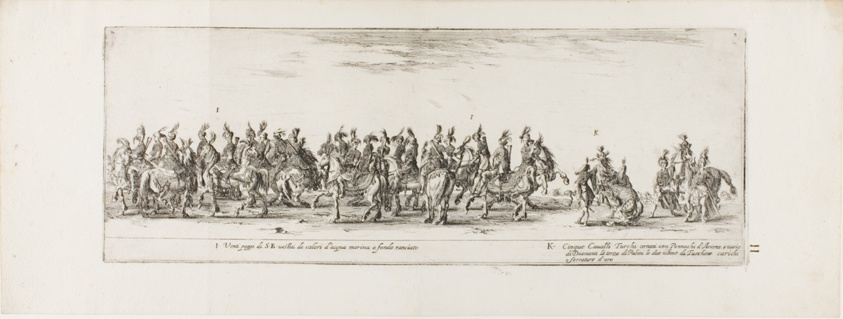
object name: Print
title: Plate Three, from Entrance of the Ambassador of Poland into Rome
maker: Stefano della Bella (Italian, 1610-1664)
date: 1633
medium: Etching on ivory laid paper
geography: Italy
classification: etching; print; prints and drawing